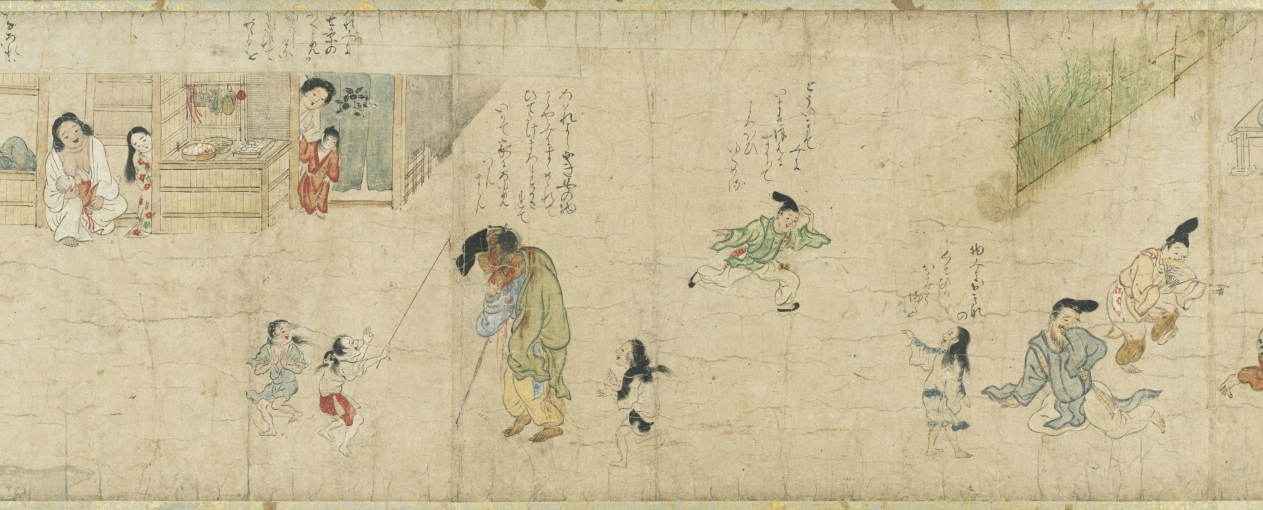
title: The Story of Fukutomi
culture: Japan, Muromachi period (1392–1573)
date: mid-1400s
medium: Handscroll; ink and color on paper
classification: Painting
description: This handscroll shows the second half of an odd tale in which a ne’er-do-well seeks the path to quick fortune and learns the art of musical flatulence. Prior to a major performance, a mentor (and competitor) advises him to consume morning glory seeds, a laxative. Thus, while performing he fouls himself and ends his days in humiliation. The audacious nature of this story and its presentation—well-animated figures with dialogue adjacent to the appropriate moments of action—create a primitive graphic novel. Japanese visual humor about farting preceded this story, but the satirical, mean-spirited twist in this tale suggests its intent was not merely to be humorous. The story was likely commissioned by court officials who disapproved of common performers rising to high positions, outflanking what was the accepted social order.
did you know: This scroll is treasured as the second oldest surviving version of this story.